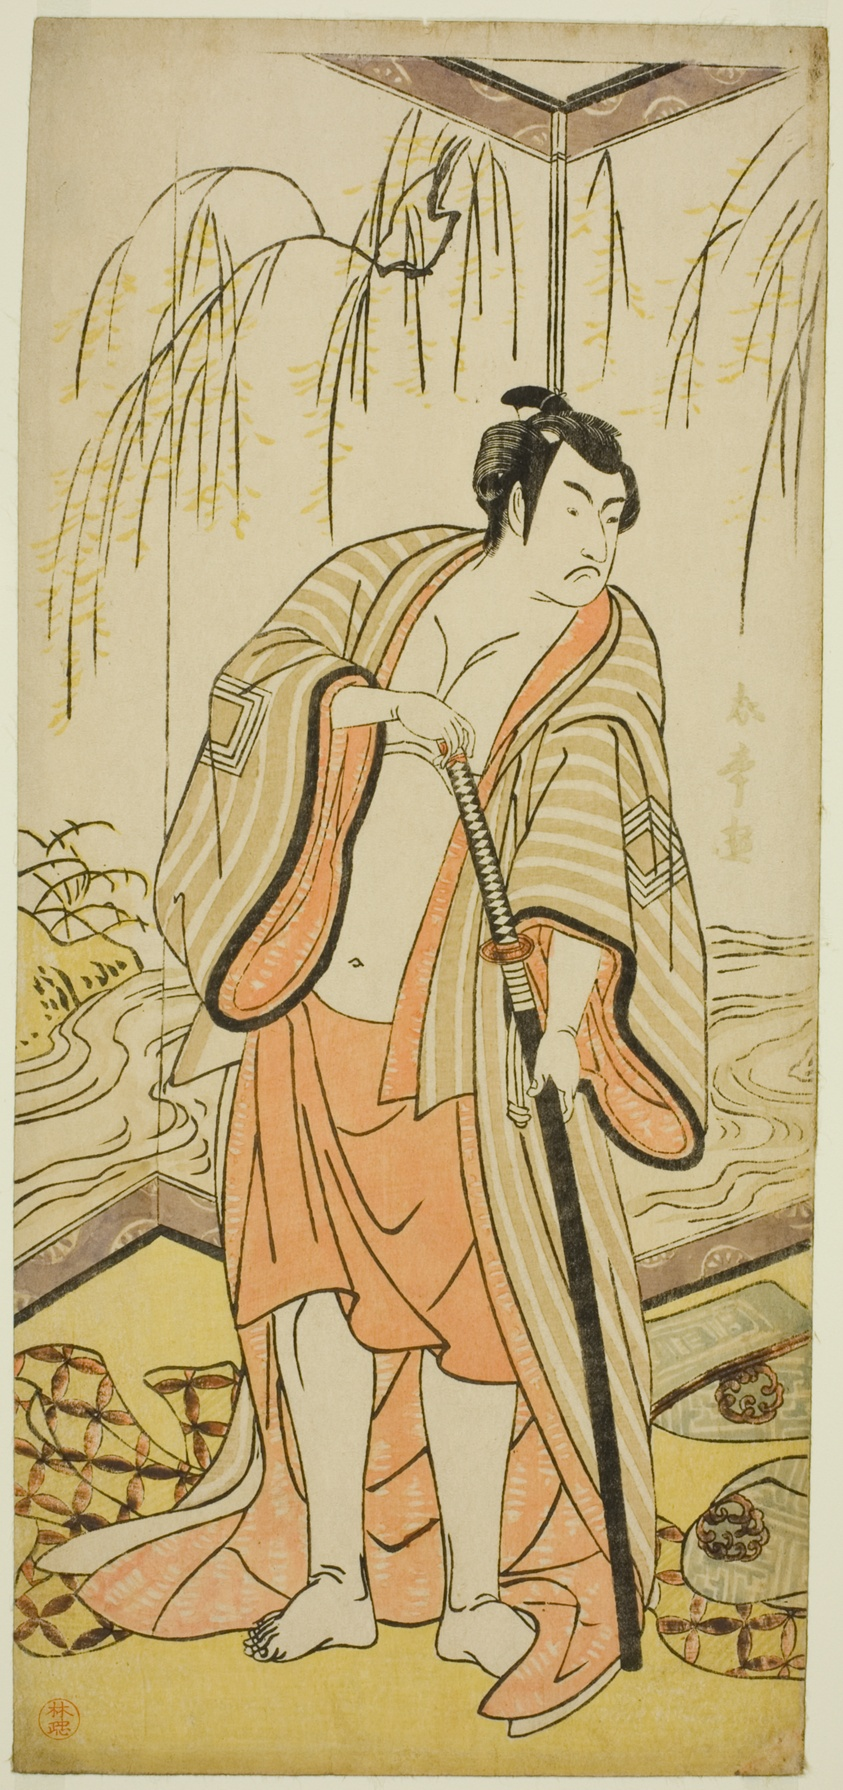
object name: Print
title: The Actor Ichikawa Monnosuke III as the Sumo Wrestler Shirafuji Genta in the Play Edo no Hana Mimasu Soga, Performed at the Nakamura Theater in the Third Month, 1783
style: Japanese (culture or style)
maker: Katsukawa Shunjo; Japanese, died 1787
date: c. 1783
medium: Color woodblock print; hosoban; center sheet of triptych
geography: Japan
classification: woodblock print; print; asian art